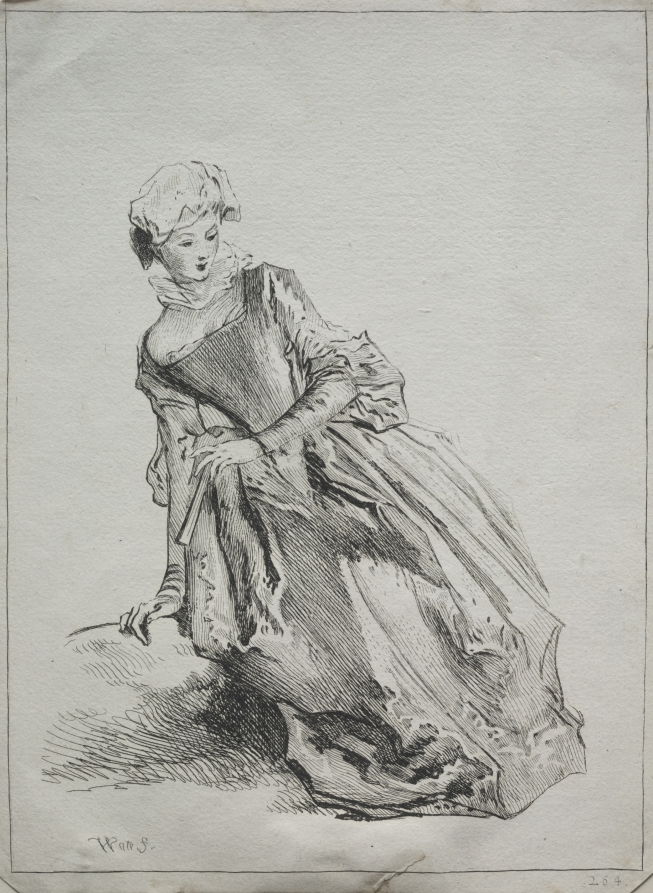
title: Woman Seated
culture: France, 18th century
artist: copy after Jean-Antoine Watteau (French, 1684–1721)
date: 1700s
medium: etching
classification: Print